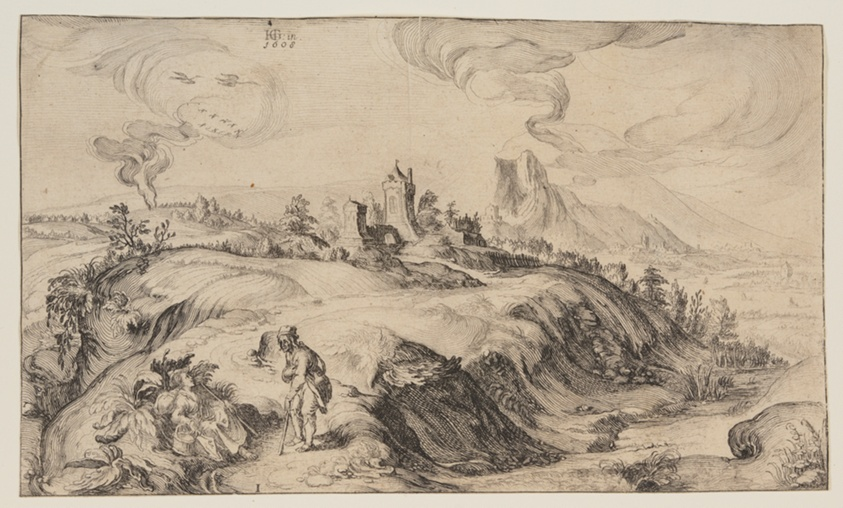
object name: Print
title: Mountainous Landscape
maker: Simon Frisius (Dutch, c. 1580–1629); Hendrick Goltzius (Dutch, 1558–1617)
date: 1608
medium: Etching on ivory laid paper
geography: Netherlands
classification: print; paper; prints and drawing; etching